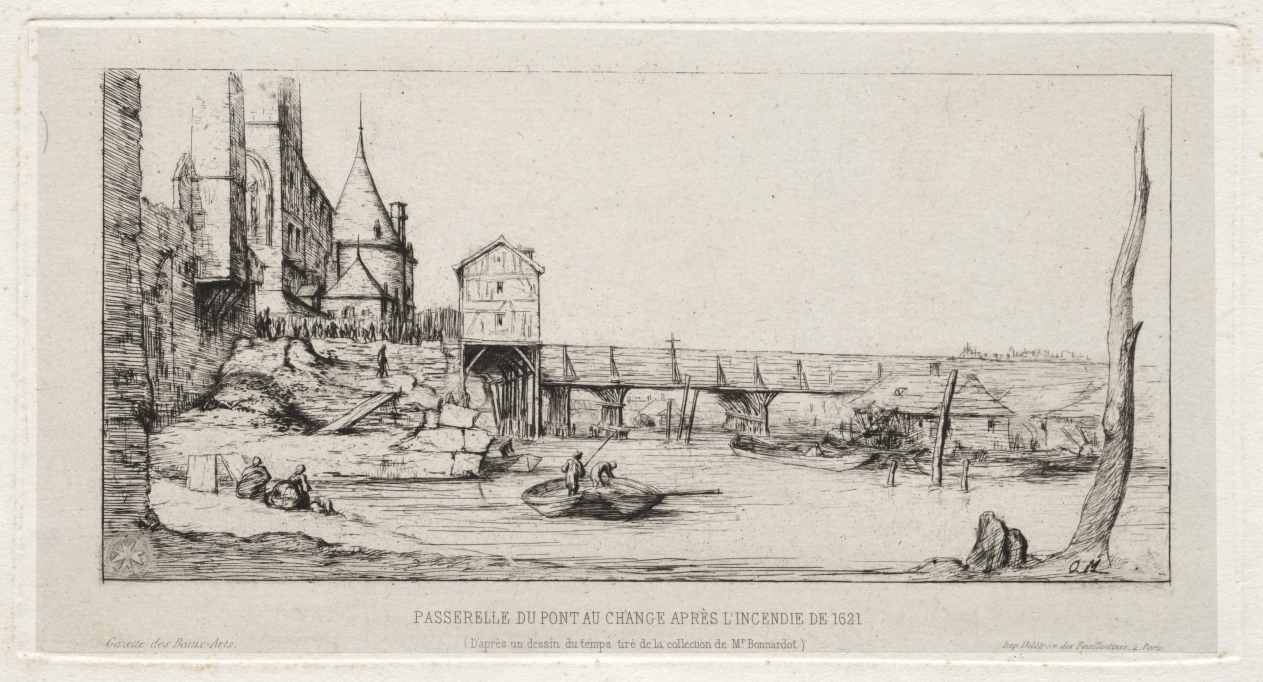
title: Footbridge Temporarily Replacing the Exchange Bridge,Paris, after the fire of 1621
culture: France, 19th century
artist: Charles Meryon (French, 1821–1868)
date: 1860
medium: etching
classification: Print